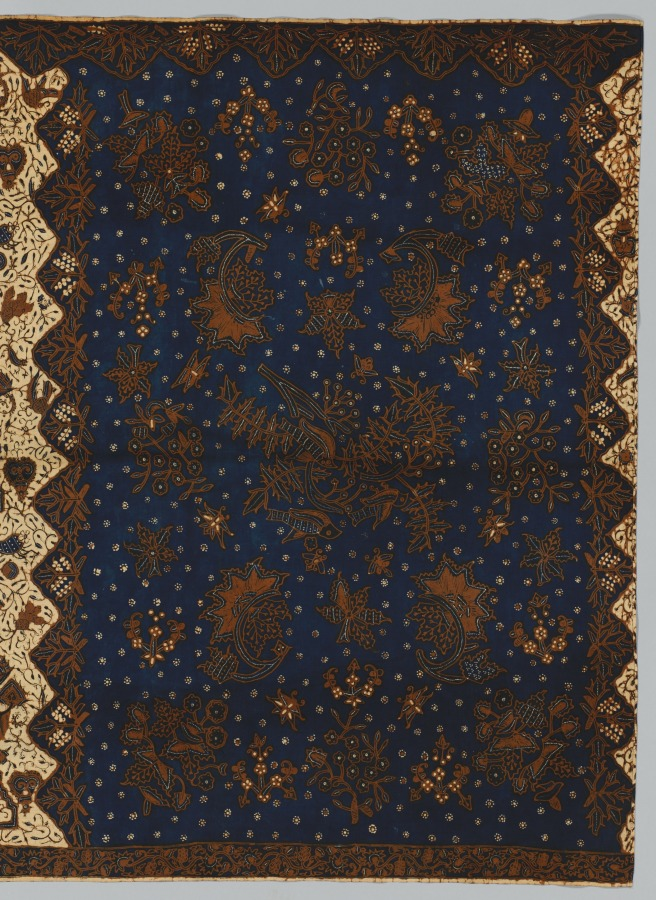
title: Wearing Cloth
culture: Indonesia, Central Java, 19th century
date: 1800s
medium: batik; cotton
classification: Textile